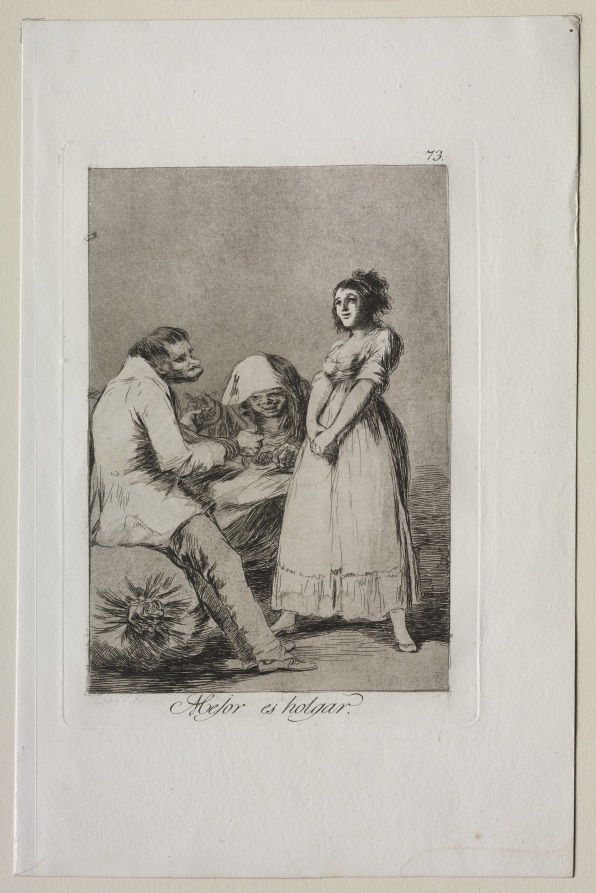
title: It is Better to be Lazy, Plate 73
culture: Spain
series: Los Caprichos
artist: Francisco de Goya (Spanish, 1746–1828)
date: 1799 (printed c. 1855)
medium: etching and aquatint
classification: Print